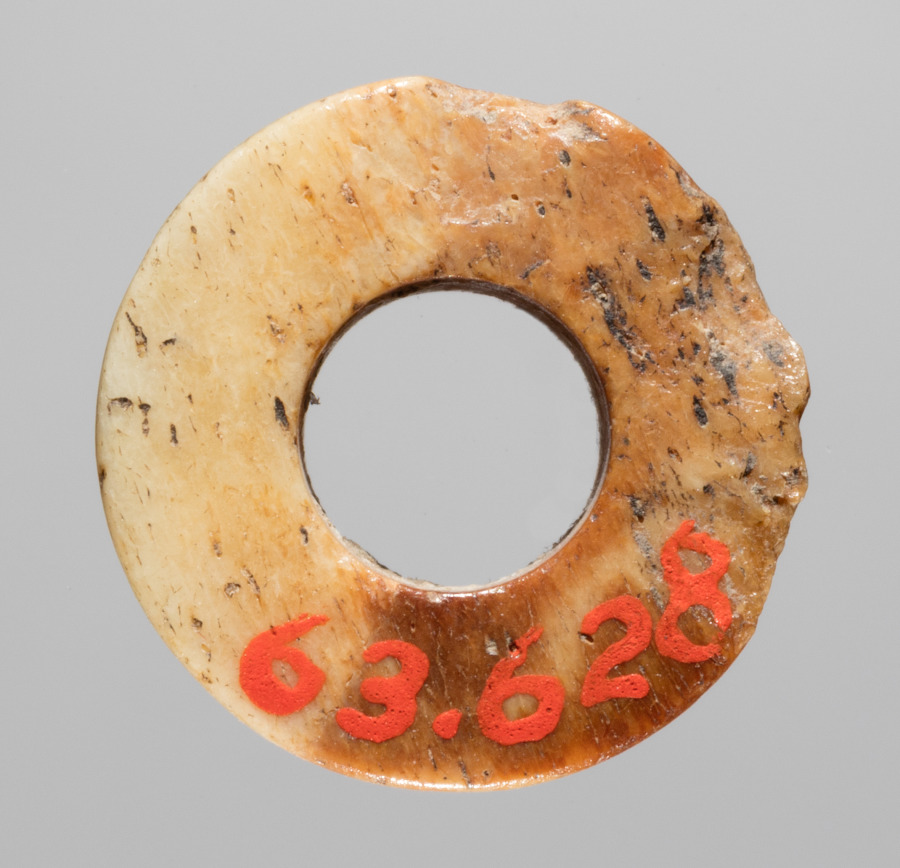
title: Spindle Whorl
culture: Iran, early Islamic period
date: 700s - 900s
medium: bone, incised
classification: Spindle Whorl